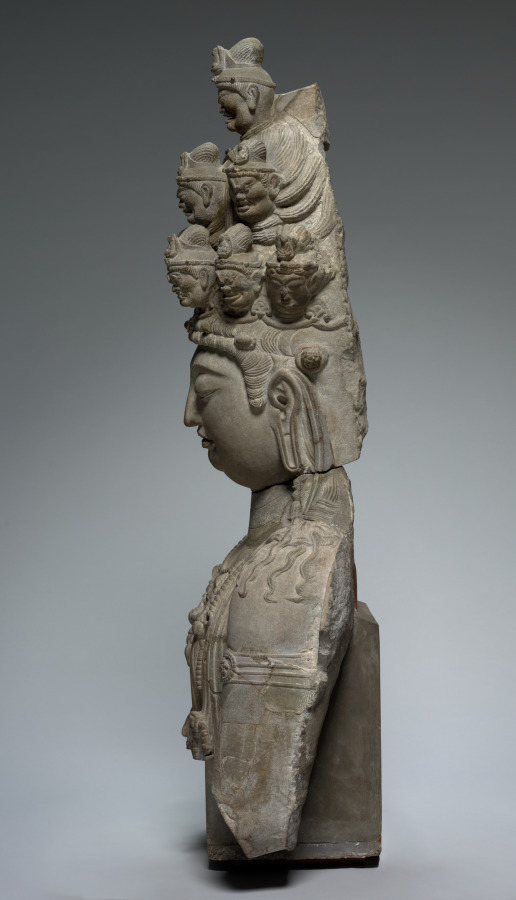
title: Eleven-Headed Guanyin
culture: China, Tang dynasty (618-907)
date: early 700s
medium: gray sandstone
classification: Sculpture